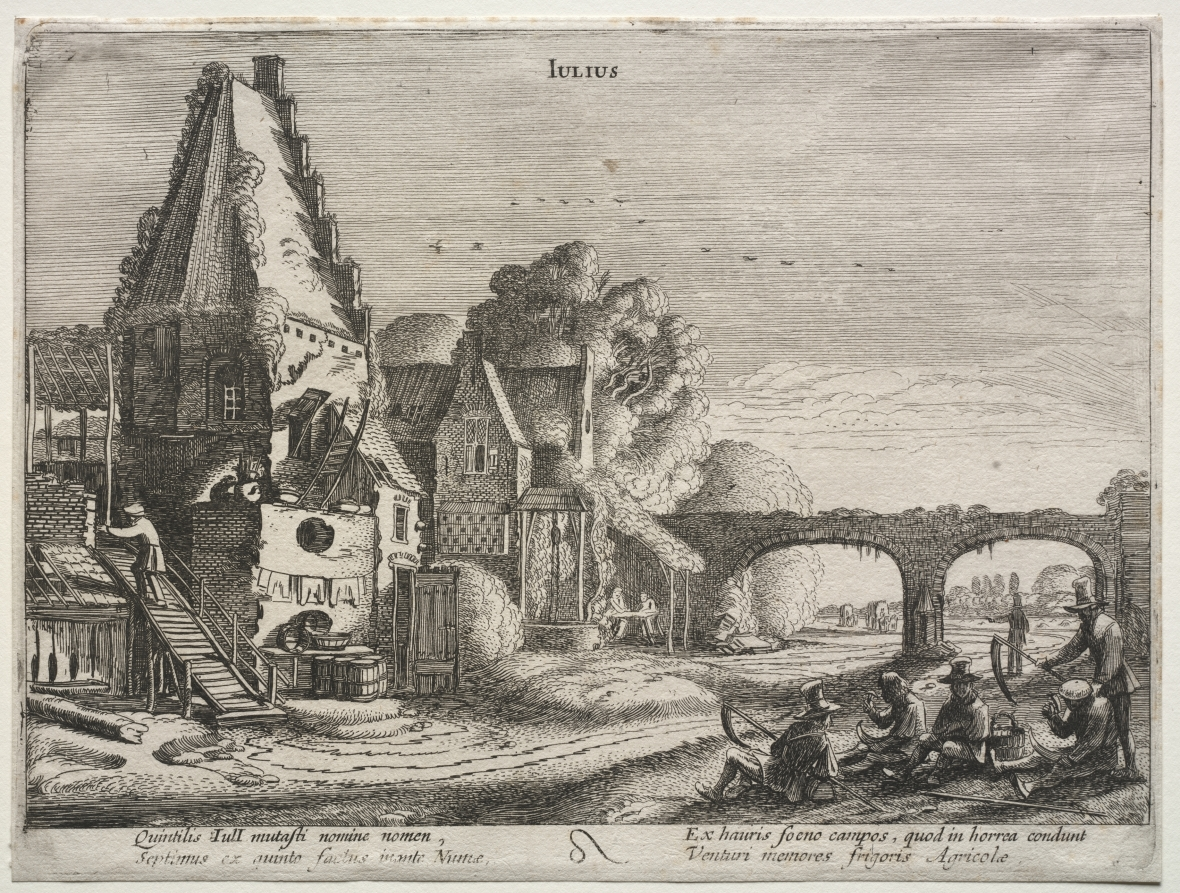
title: The Twelve Months: July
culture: Netherlands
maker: Jan van de Velde II (Dutch, 1593–1641)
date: 1608–18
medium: etching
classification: Print